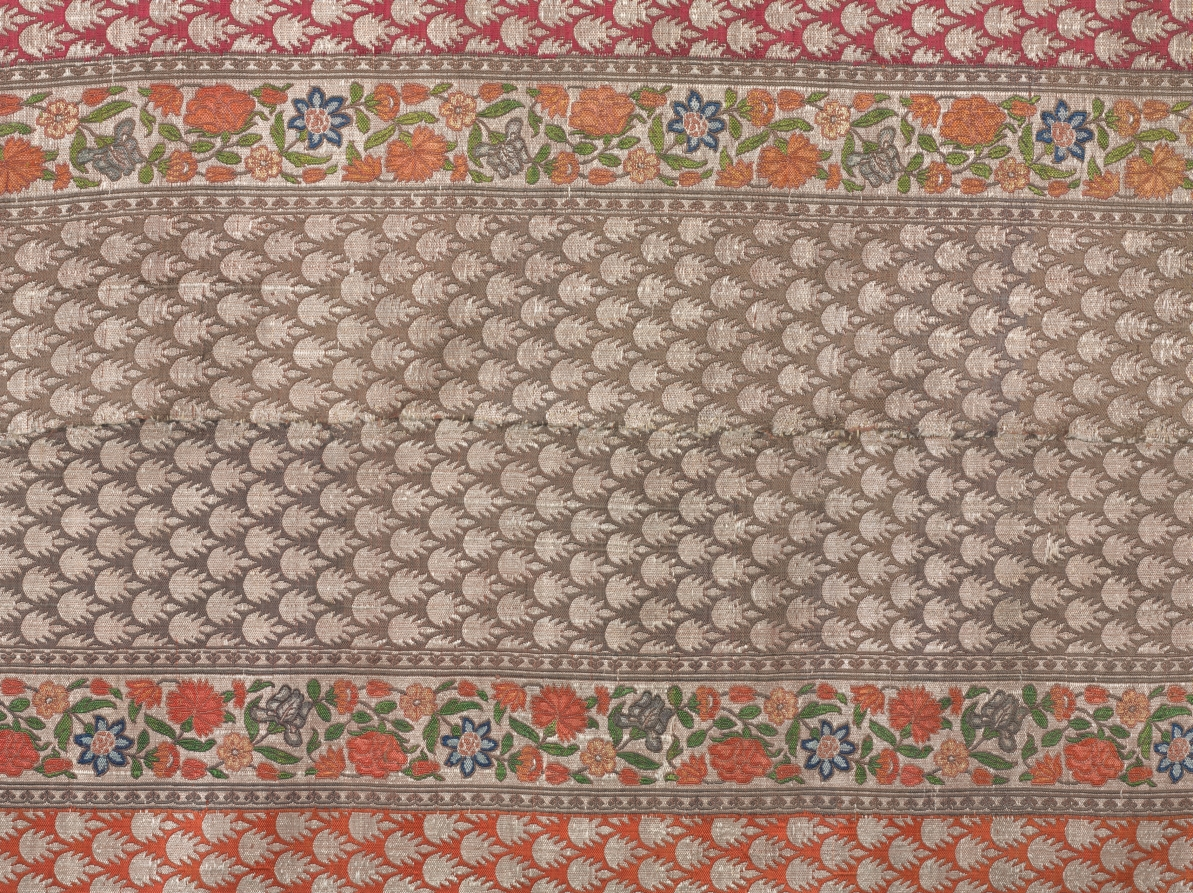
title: Sash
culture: Iran, 18th century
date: 1700s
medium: Silk taquete, brocaded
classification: Textile